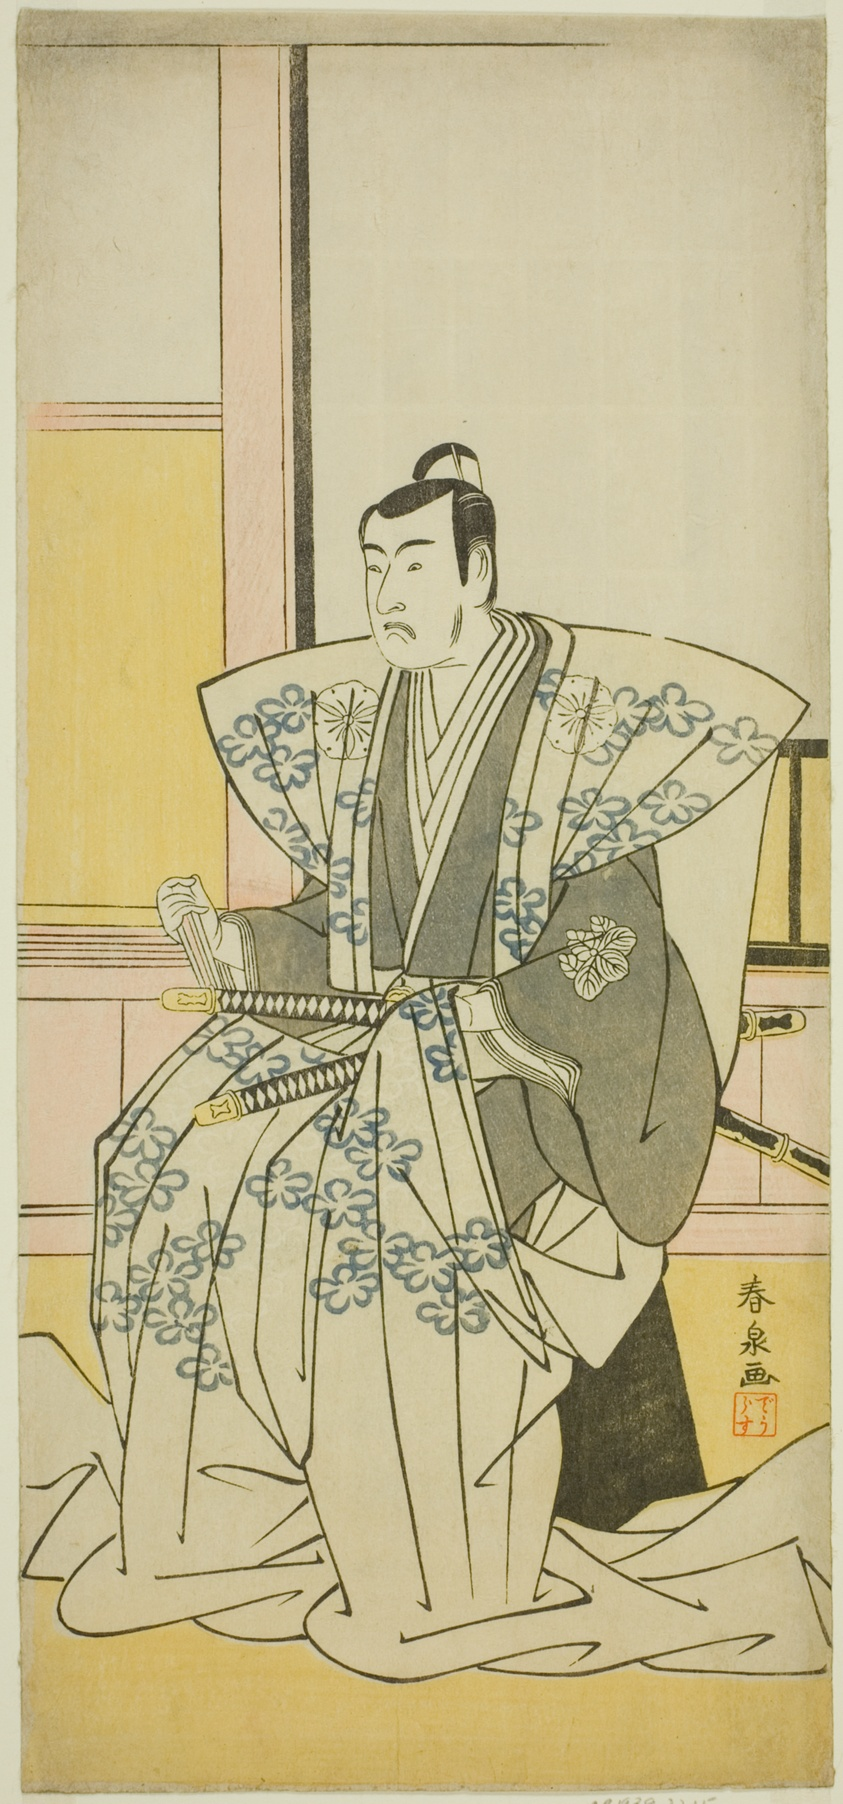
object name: Print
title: The Actor Matsumoto Koshiro IV as Hatakeyama Shigetada in the Play Edo no Fuji Wakayagi Soga, Performed at the Nakamura Theater in the First Month, 1789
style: Japanese (culture or style)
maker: Katsukawa Shunsen (Japanese, active 1780s-early 1790s)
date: c. 1789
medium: Color woodblock print; hosoban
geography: Japan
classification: woodblock print; print; asian art